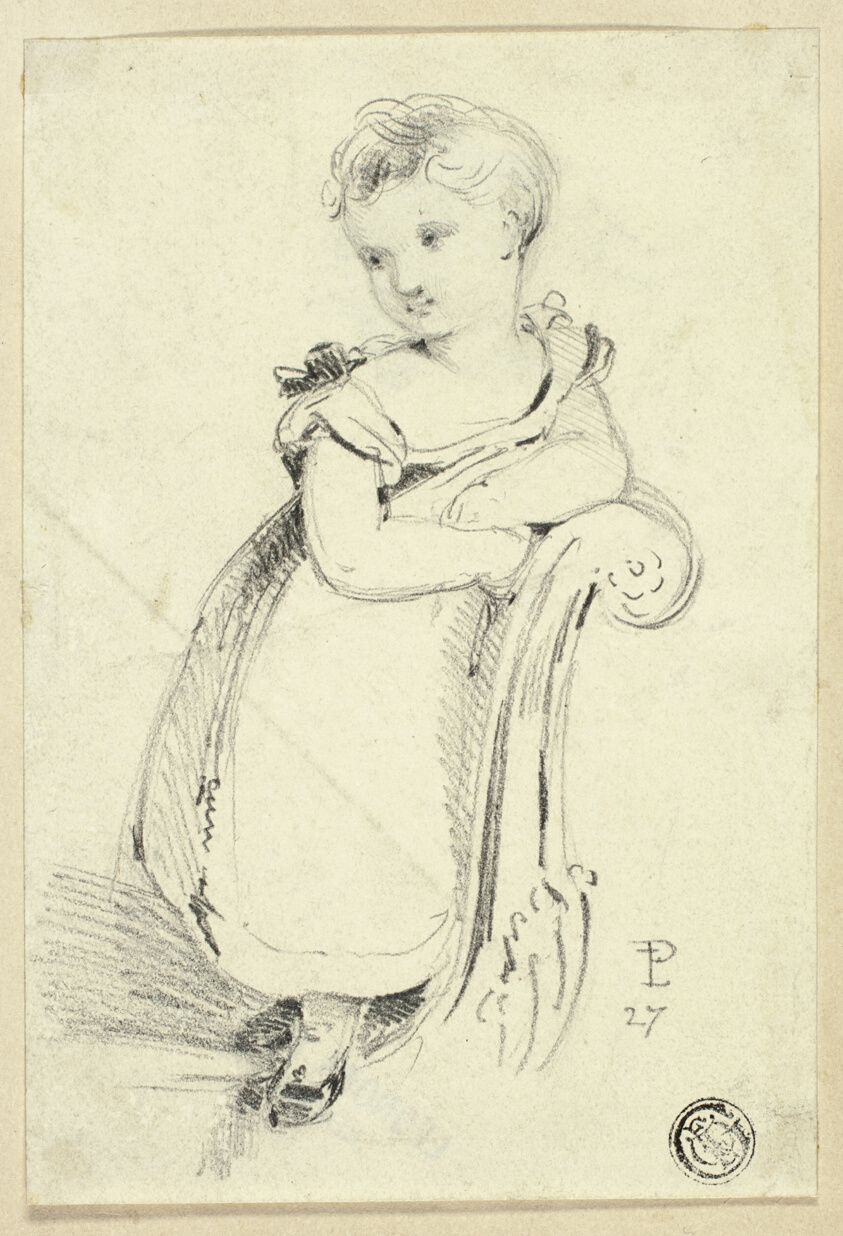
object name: Drawing and Watercolor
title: Little Girl Standing on Sofa (recto); Fragment: Back of a Woman's Head (verso)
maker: Edmund Thomas Parris (English, 1793-1873)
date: c. 1827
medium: Graphite (recto and verso) on cream wove paper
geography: England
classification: graphite; drawings (visual works); prints and drawing